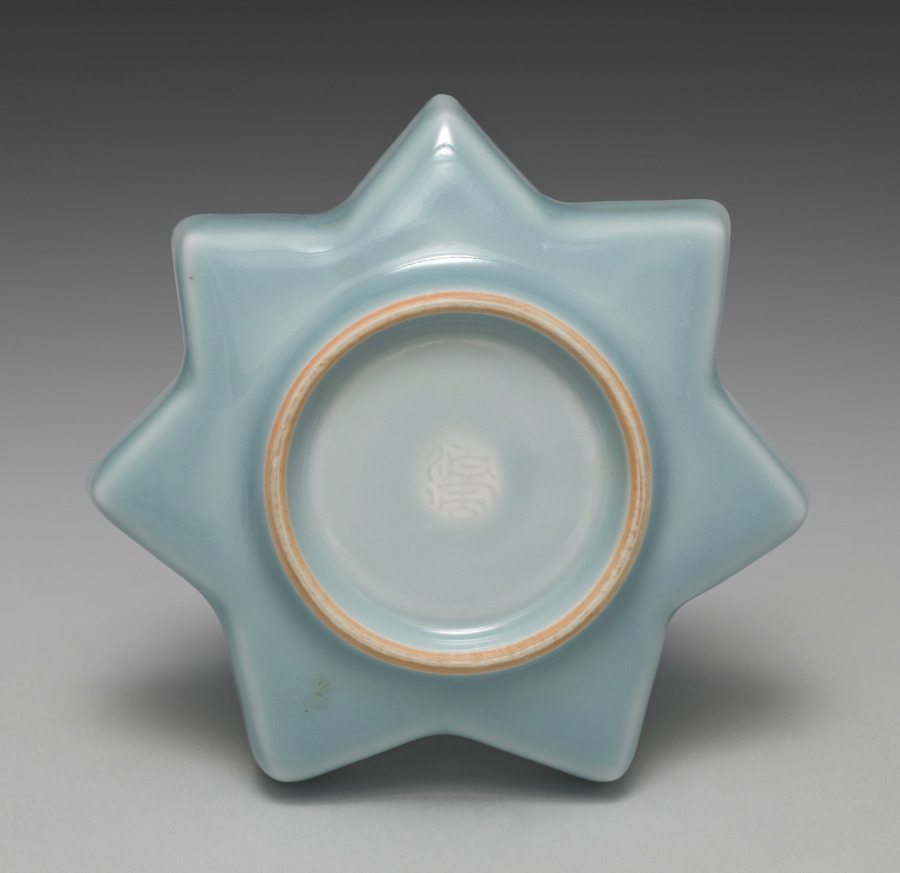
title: Saucer from Maple Leaf-Shaped Saucers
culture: Japan, Meiji period (1868–1912)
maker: Seifū Yohei III (Japanese, 1851–1914)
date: 1893–1914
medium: One of five dishes from a set of ten; porcelain with blue glaze and molded design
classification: Ceramic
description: These maple leaf–shaped saucers, like Yohei III's five shell saucers CMA 2022.188, have a long, horizontal box with a separate compartment for each piece. Now a set of five, these dishes were originally a set of ten, stored in two boxes of five each. From their housings, which accommodate differing numbers of objects, one can hypothesize that while some items created by the Seifu studio were intended to be acquired in larger sets, and thus were perhaps made to order, others, like these, may have been items to be purchased of the shelf in set quantities that allowed clients flexibility in scale. The box for these five saucers describes them as “heavenly blue[–glazed] porcelain” (tenseiji). The veins of the leaves are slightly raised in the clay so that the glaze pools around them and they stand out as white where the glaze thins. There are longer lines at the points of the leaves and shorter ones following the wall of each indentation so that the design has both a horizontal and a subtle vertical dimension.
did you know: Each leaf-shaped saucer in this set has a round foot.